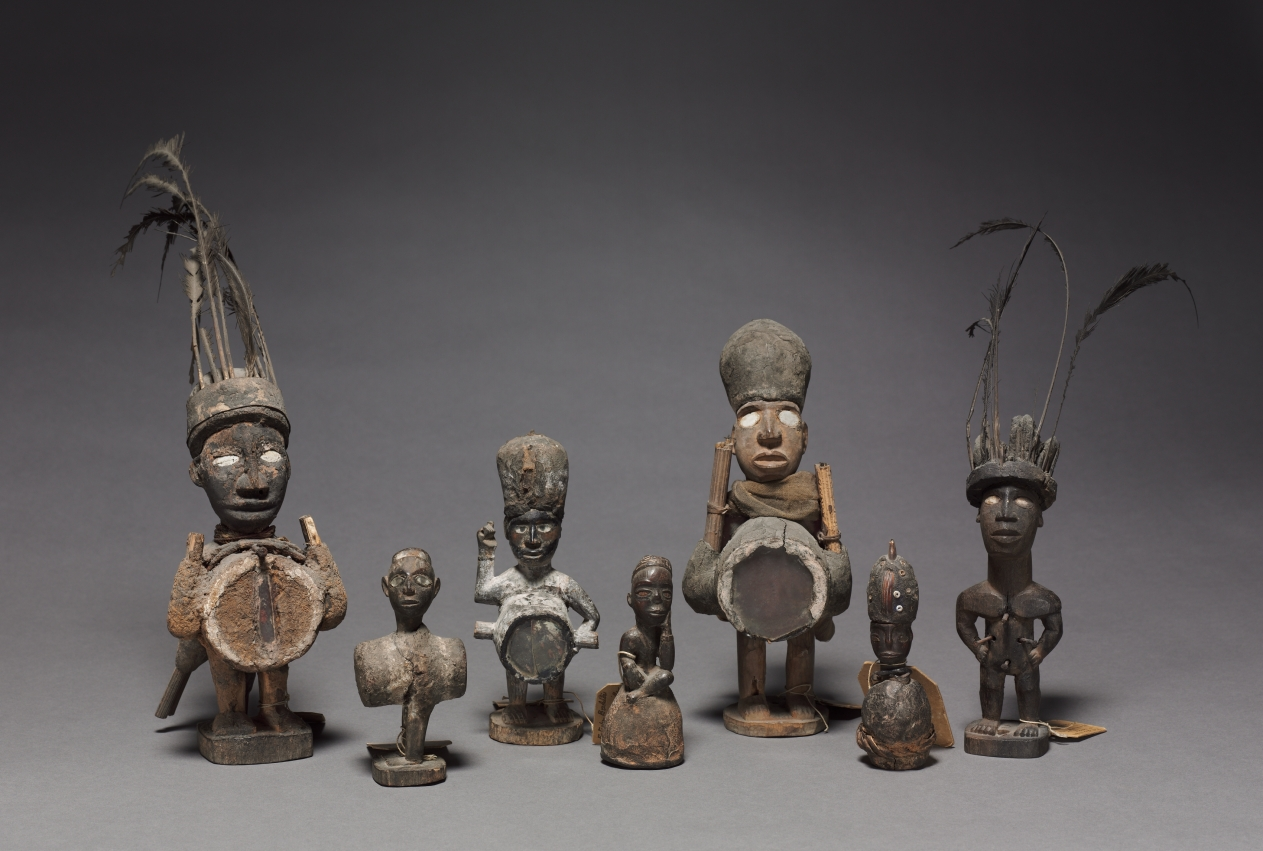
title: Power figure (nkisi)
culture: Africa, Central Africa, Republic of the Congo, Kongo-style maker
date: late 1800s-early 1900s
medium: Wood, metalized glass, organic materials (including resin), feathers, plant fibers, iron, and copper alloy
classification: Sculpture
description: One of seven minkisi figures previously in the René and Odette Delenne collection, this object contained medicines in which an ancestral spirit was believed to reside. This figure is one of the two tallest in the collection. Feathers of a bird of prey adorn its head, with two small guns pointing upward and a third hanging down. It had belonged to “the sorcerer of Louboulou.”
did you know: This is one of two tallest in the collection of spiritual figurines loaded with gunpowder to shoot at witches: nduda, or “night guns.”